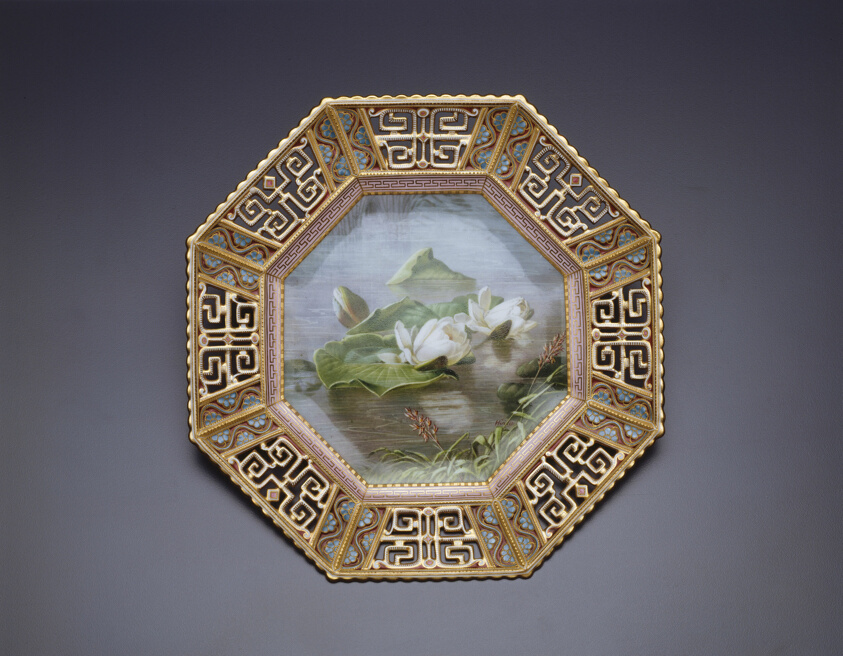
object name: Ceramics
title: Plate with Water Lilies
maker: Copeland Porcelain Factory; English, founded 1847; Painted by Charles F. Hürten; German, active in England, 1818-1897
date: c. 1885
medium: Soft-paste porcelain, polychrome enamels, and gilding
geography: East Stoke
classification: plate (general, dish); tableware; dish (vessel); ceramics; porcelain; european decorative arts